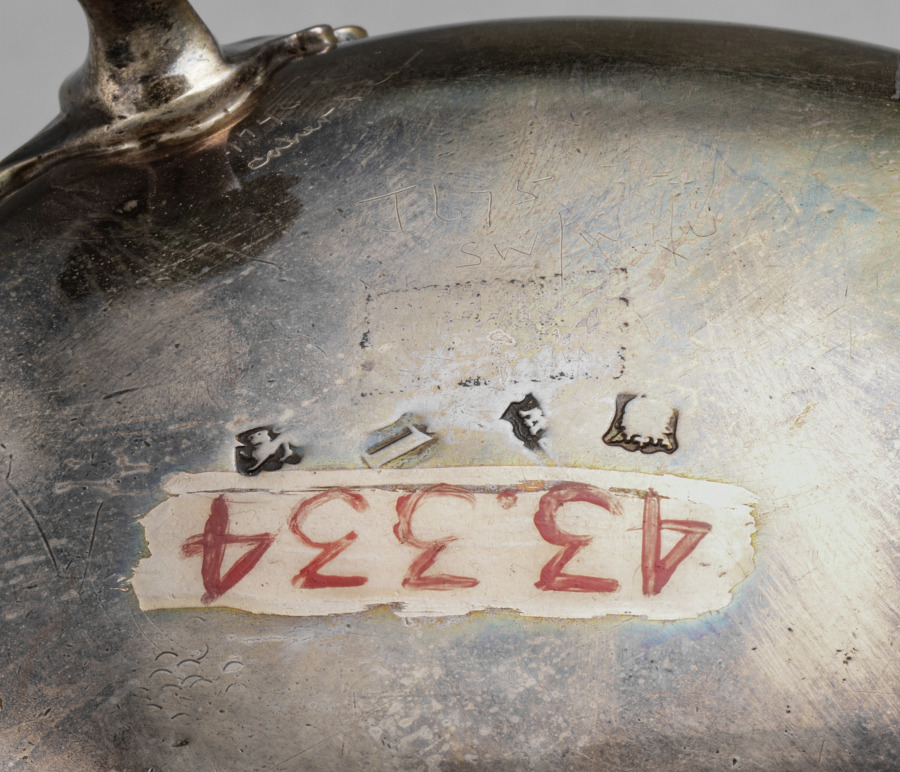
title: Gravy Boat (1 of 2)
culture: England, 18th century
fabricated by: Samuel Wood (British)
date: 1746–1747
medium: silver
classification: Silver